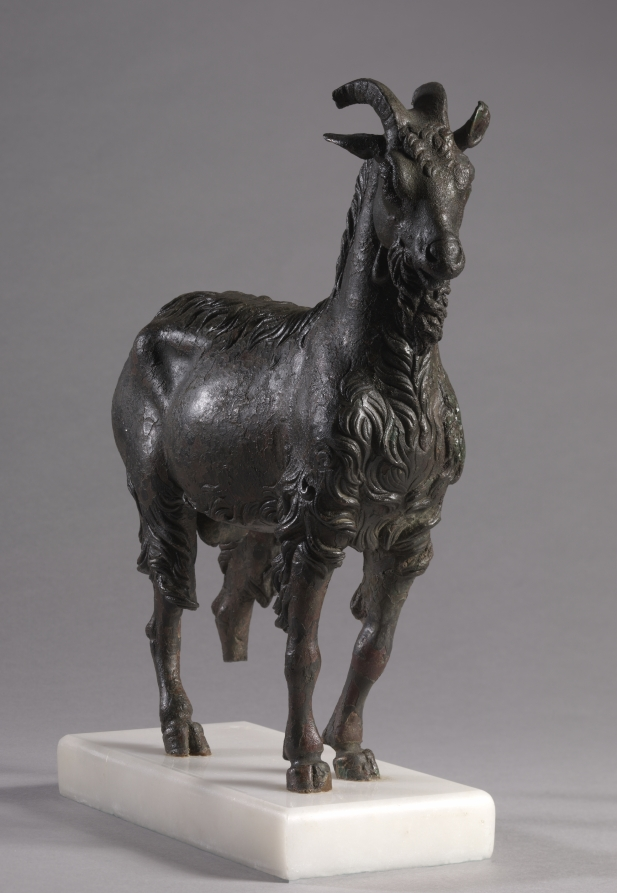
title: Nanny Goat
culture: Greece, Hellenistic period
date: late 200s BCE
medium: bronze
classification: Sculpture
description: Goats were among the earliest domesticated animals and figured prominently in Greek art and mythology since at least the 8th century BC. This example with its powerful stance, curly beard, and horns is not a ram but an expecting doe with swollen flanks. The subject is rare and its meaning unclear. Possibly she was part of a group dedication to a goddess. The sunken areas at the tail and hips and her open mouth, indicating heavy breathing, are signs that she is ready to give birth.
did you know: This sculpture depicts a pregnant goat, which is extremely rare.